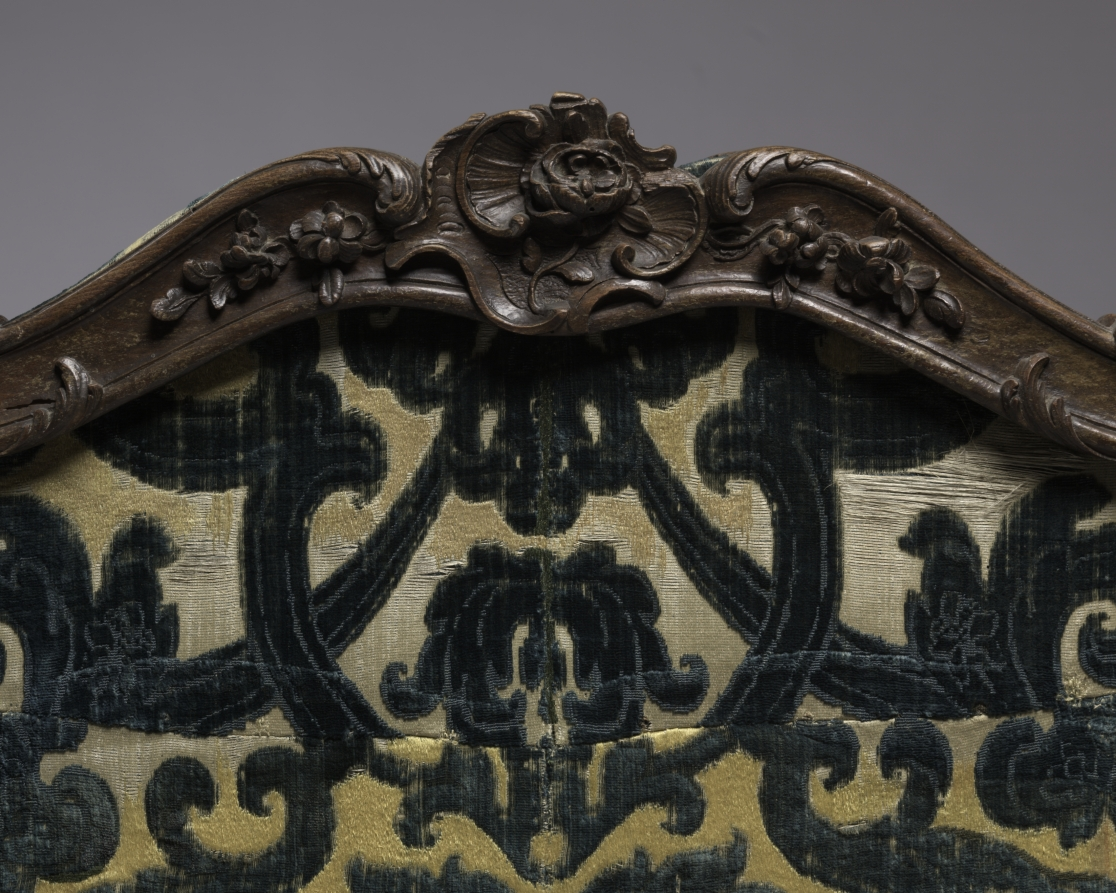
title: Fire Screen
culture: France, 18th century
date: c. 1750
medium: wood and velvet panel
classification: Furniture and woodwork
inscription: inscribed beneath in three places: 32.